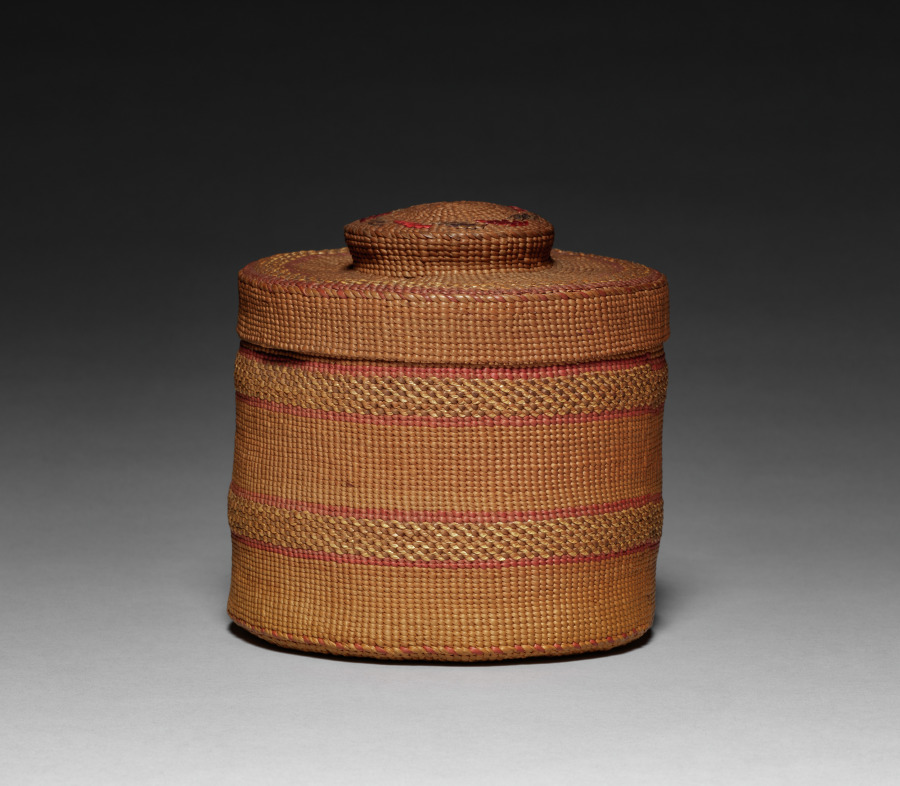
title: Covered Basket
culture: Northwest Coast, Haida, Unassigned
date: Unassigned, before 1917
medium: twilled, imbricated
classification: Basketry